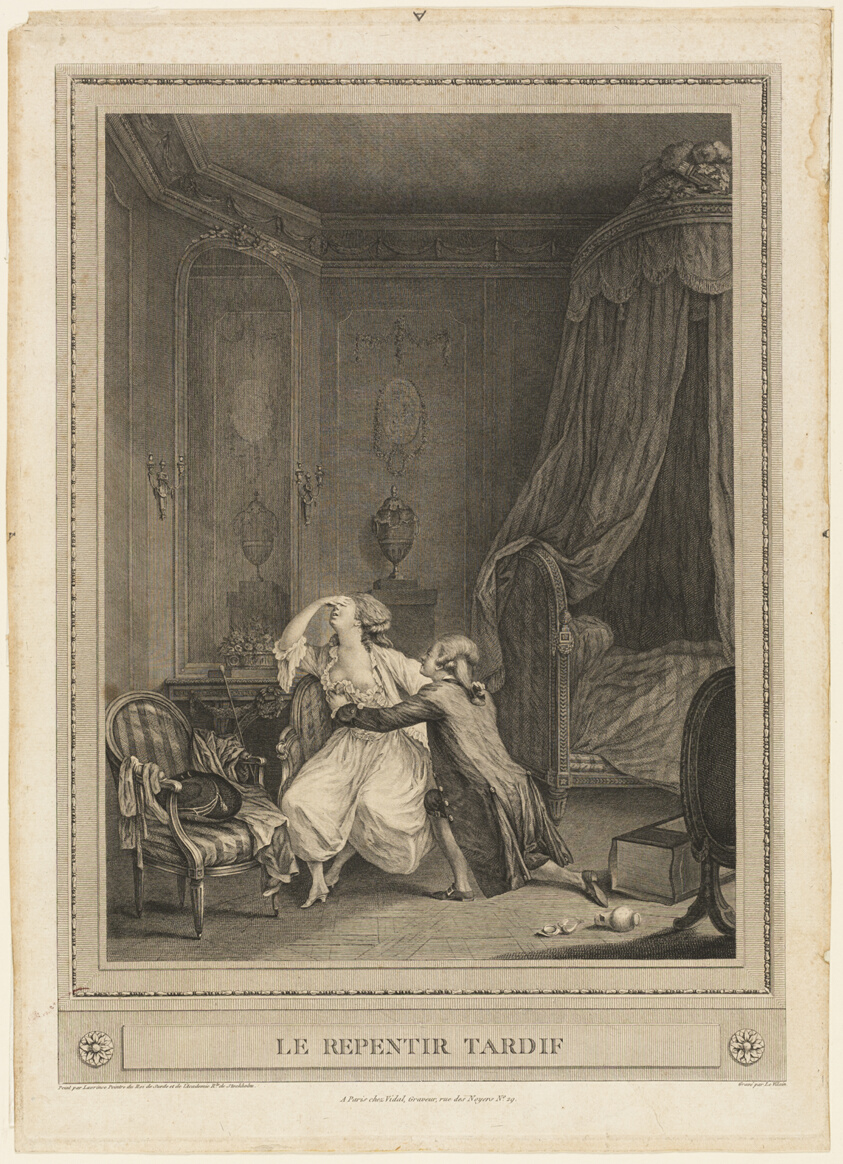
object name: Print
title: Tardy Repentance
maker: Ferdinand Levillain (French, 1837-1905); after Nicolas Lavreince (Swedish, 1737-1807)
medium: Etching on paper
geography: France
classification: etching; print; prints and drawing